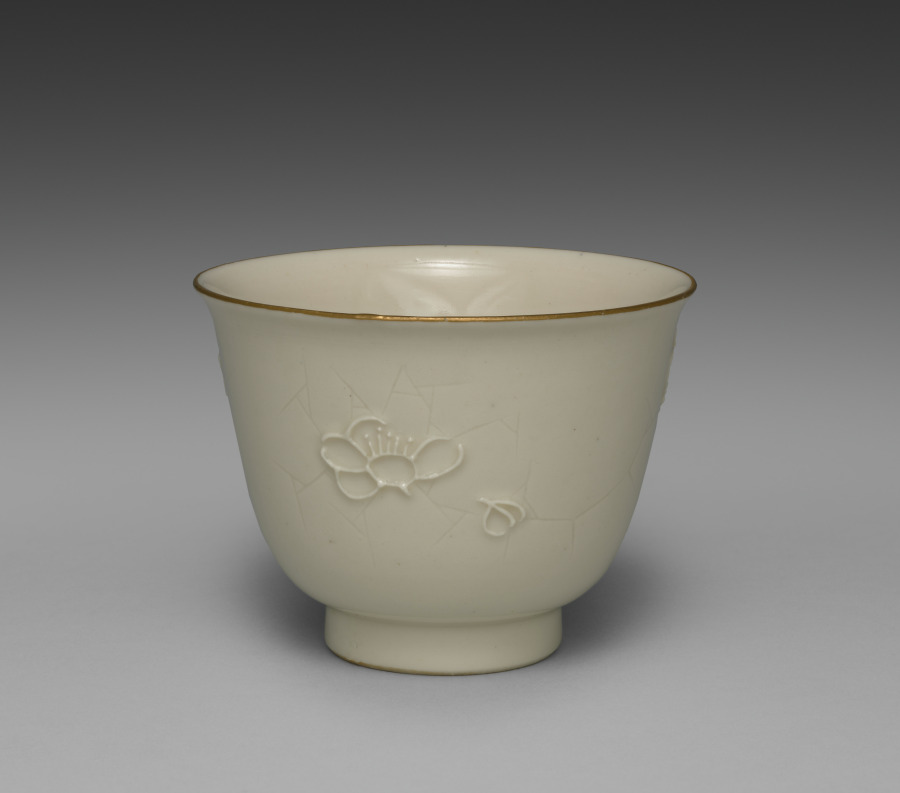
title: Drinking Cup from Dining Set with Plum Blossoms and Cracked-Ice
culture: Japan, Meiji period (1868–1912)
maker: Seifū Yohei II (Japanese, 1844–1878)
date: c. 1875–78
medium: Porcelain with molded designs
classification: Ceramic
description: Each item in this set has a delicate low-relief design of flowering plum branches over scattered, intersecting lines meant to resemble the cracked-ice surface of a frozen body of water and is signed on the base in gold pigment. While Yohei II produced many fine works in underglaze blue, like those produced by Kiyomizu Shichibei, he also made works in quite different styles later in his career, from the early 1870 s. In 1873, he was appointed purveyor to the Industrial Center of Kyoto Prefecture, a designation associated with Kyoto’s efforts to reach an international market through the port of Kobe; and from 1875 until his death, he was involved in national-level projects to present Japanese ceramics across the world. It was during this period that Yohei III was apprenticed to Yohei II, and it has been suggested that this set may in fact be an early example of Yohei III’s work, which he signed with his teacher’s name. Decorated with flowers resembling Japanese textile motifs, the set calls to mind the design of Yohei II’s pair of vases with plum blossoms in the Victoria and Albert Museum. Here, the elaborate trees created for a formal public exhibition setting have been translated into the approachable blossoms of the genteel domestic environment. While the designs are consistent across the pieces, each raised flower petal and pistil and each incised line in the ice was done by hand, so the cups, bowls, and dishes are similar yet unique. The bottoms of two boxes once identified the set’s owner, but the information has been deliberately obscured with black ink. However, inscriptions still visible appear to indicate two occasions, once at the end of July 1886 , and once again in June 1916 , when parts of the set were requested from Hokura in Niigata Prefecture. The location corresponds to a neighborhood in the present-day city of Jōetsu. The surname Tsuji 辻 also appears on a paper tag affixed to one of the box cloths. Future research may possibly reveal more about their provenance. A vase by Yohei III in a private collection combines the formal grandeur of the Yohei II vases in the Victoria and Albert Museum with the gentler design of this dining set, placing flowering plum trees against soft, scalloped-edge clouds resembling those in golden screens.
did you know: The dining wares have a creamy white coloration that the four boxes containing them identify as Korean in style.